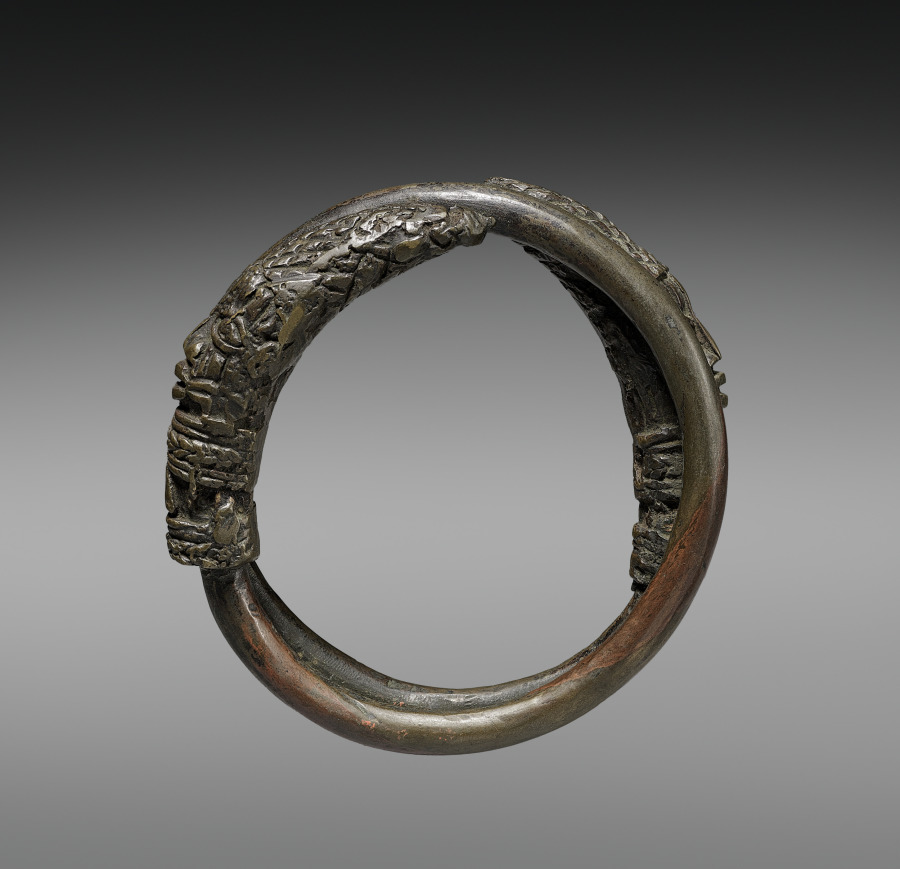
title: Hand Coil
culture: Nigeria, Benin Kingdom, Ẹdo peoples, members of the Igun Eronmwon (royal brasscasters) guild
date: 1800s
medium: Copper alloy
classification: Implements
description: While this looks like a bracelet, it wasn’t worn around a wrist. A chief or titleholder grasped this “hand coil” vertically during the annual Iguẹ festival, during which such men reaffirm their relationship to the Ọba, whose mystical powers are strengthened. An image of a man’s head caps each end of the thick, twisted metal. Repeated human touch rubbed the undecorated lengths bright and shiny. Though small, the coil’s detail is enormous: to capture it, the artist incised the designs in wax during the casting process. They show these men are elites, with necklaces, caps, and whisker-like facial markings.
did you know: This is a unique object; it was made using the lost-wax casting technique, which destroys the wax mold in the creation process.